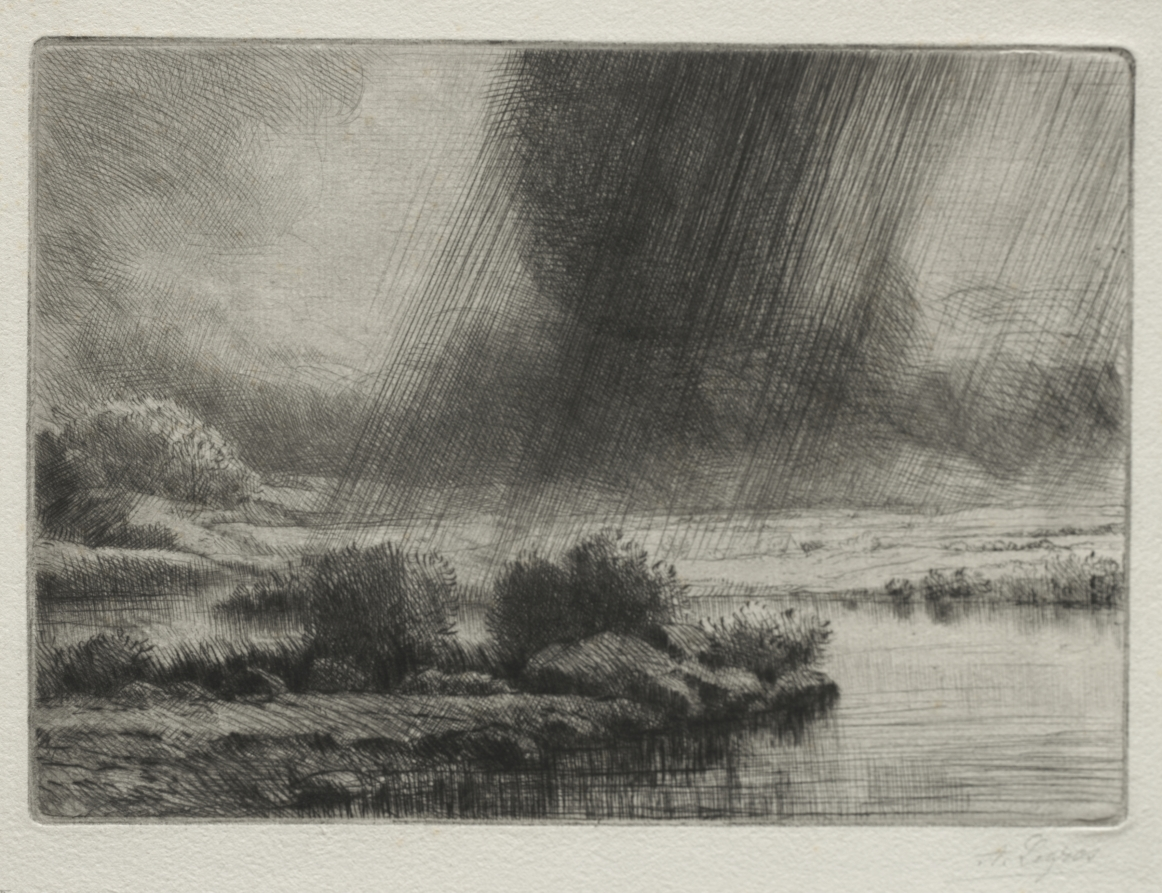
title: A Storm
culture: France, 19th century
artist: Alphonse Legros (French, 1837–1911)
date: c. 1857–1911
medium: drypoint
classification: Print